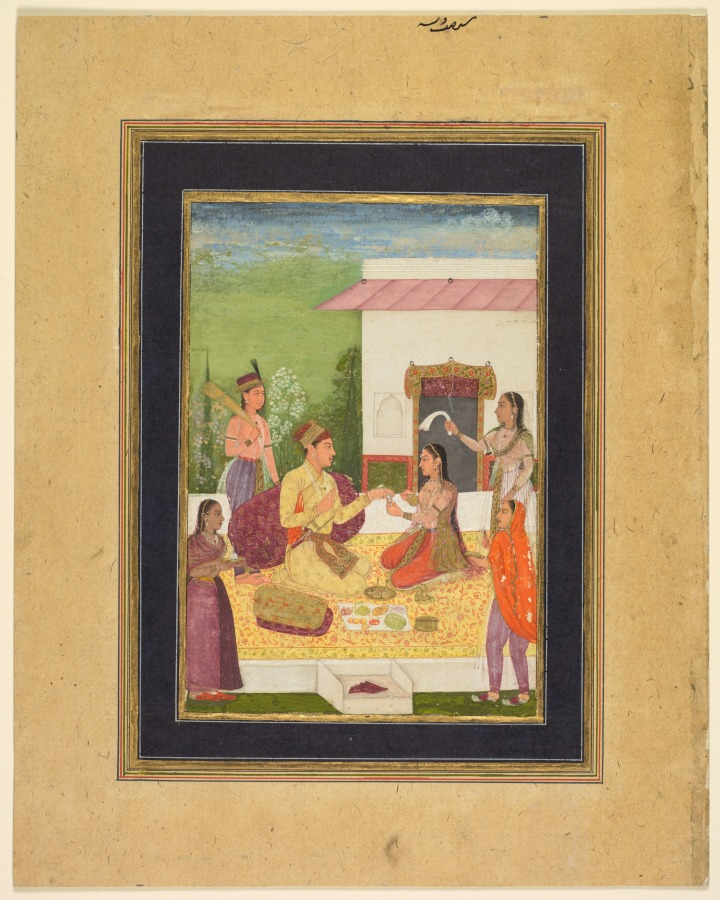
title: A prince conversing with a woman while taking refreshments on a terrace (recto)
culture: Mughal India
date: c. 1710–20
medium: Gum tempera, ink, and gold on paper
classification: Painting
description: The carpet turns a terrace into a space where a prince can enjoy the company of women over wine and fruits. A covered box on the carpet contains aromatic betel nut packets for pleasurable chewing. He has removed his shoes, which are left on the marble step. A princess pours liquor from a golden bottle into a tiny blue-and-white ceramic cup. The pair’s royal status is indicated by the attendants who hold the white cloth and peacock-feather whisks. Two other women bring jewels and a vial of perfume to be inspected and discussed by the royal connoisseurs.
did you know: The prince removed his shoes before joining the picnic on the carpeted terrace.